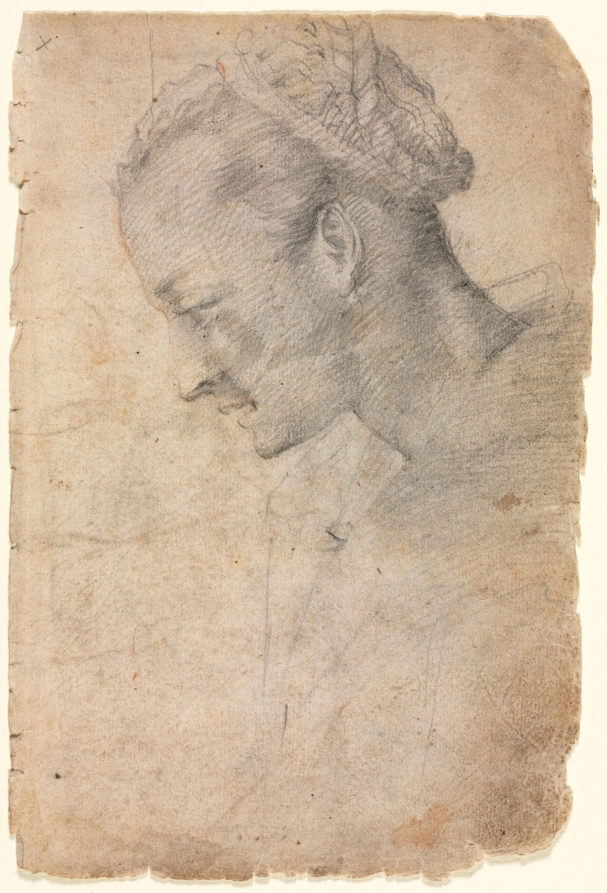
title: Profile of a Woman's Head (recto)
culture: Italy, 16th century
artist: Alessandro Casolani (Italian, 1552/53–1607)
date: 1550–1600s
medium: black chalk(?) with traces of red chalk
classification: Drawing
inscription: upper left, in graphite: x